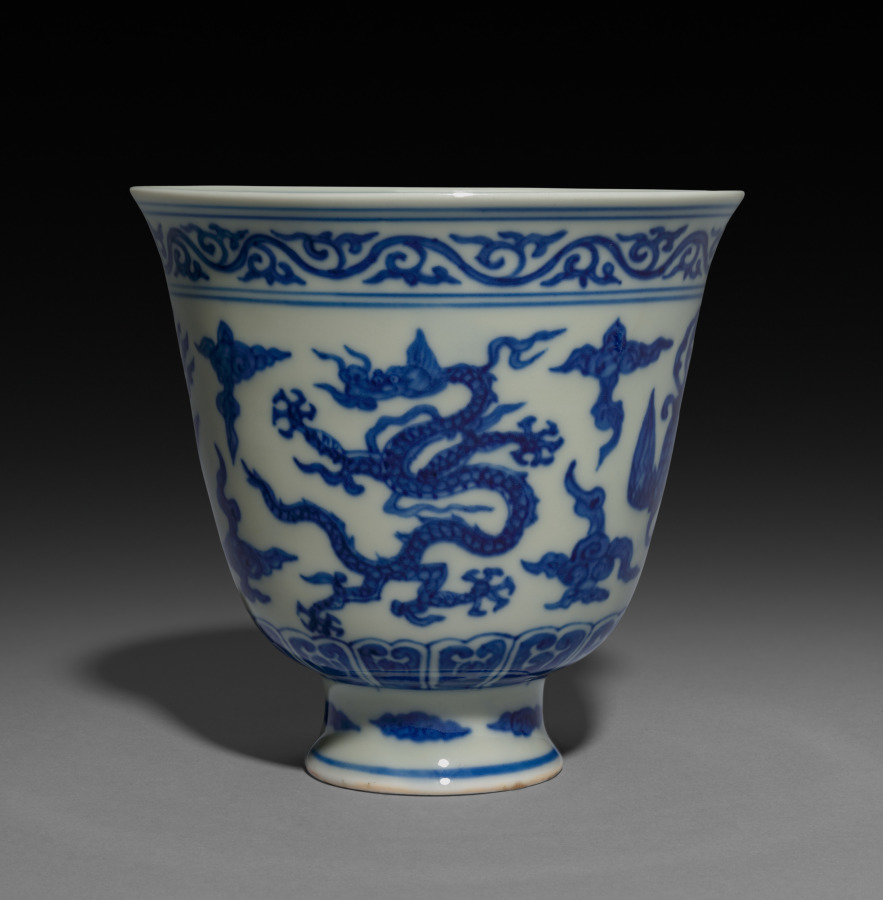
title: Cup with Dragons and Phoenixes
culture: China, Jiangxi province, Jingdezhen kilns, Ming dynasty (1368-1644), Jiajing mark and reign (1522-66)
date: 1522–66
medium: porcelain with underglaze blue decoration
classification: Ceramic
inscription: 大明嘉靖年製